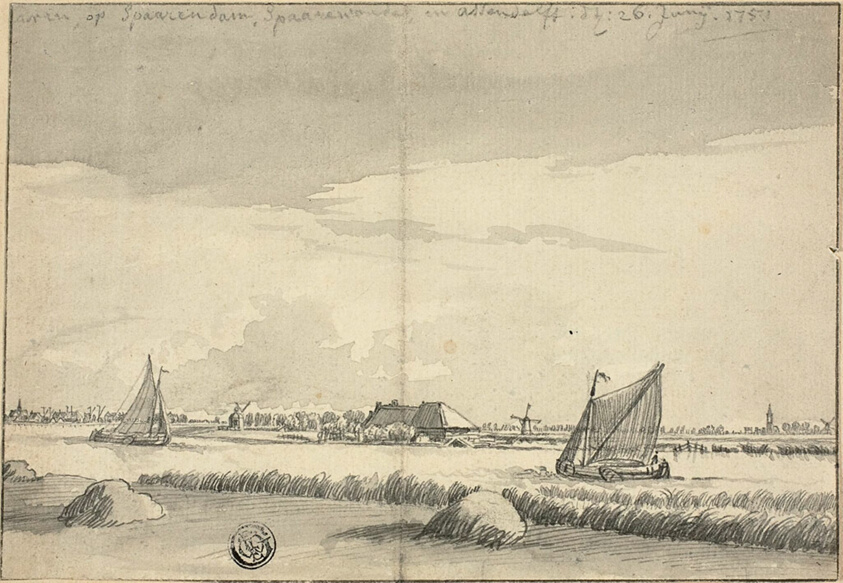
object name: Drawing and Watercolor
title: Sailboats on Canal near Spaarendam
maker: Attributed to Jan de Beyer (Swiss, 1698-1790); or Pieter de Molijn (Dutch, 1595-1661)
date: 1751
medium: Pen and gray ink with brush and gray wash over graphite, on ivory laid paper, tipped onto cream laid card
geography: Switzerland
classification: ink or chalk wash; drawings (visual works); prints and drawing